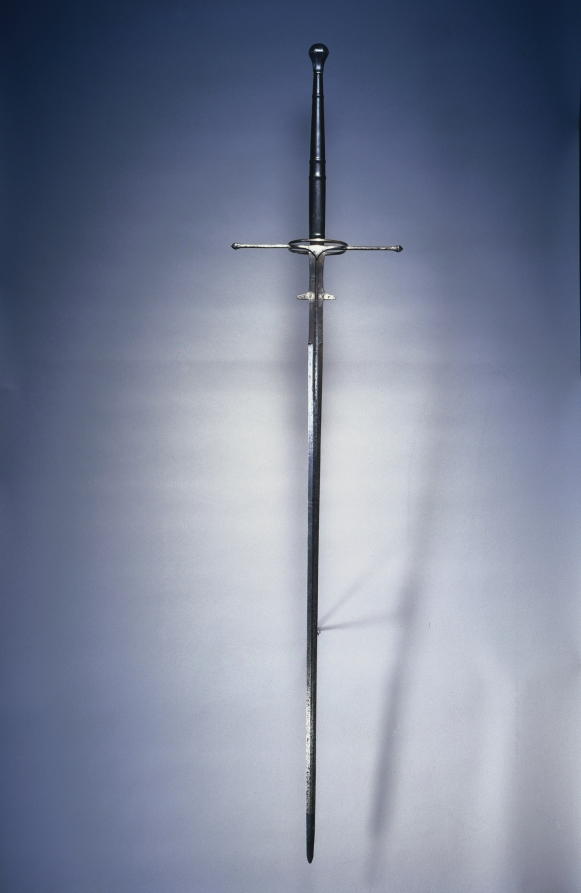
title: Two-Handed Sword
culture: Spain, Toledo, second half of 16th Century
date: 1550–1600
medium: steel, wood and leather grip; fluted pommel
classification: Arms and Armor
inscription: TOLEDO and IVAN LVIS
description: The two-handed sword, originally a weapon of war for specialist infantry, is so named because two hands were required to wield it. By the late 1600s, these enormous swords assumed a largely ceremonial or bodyguard function.